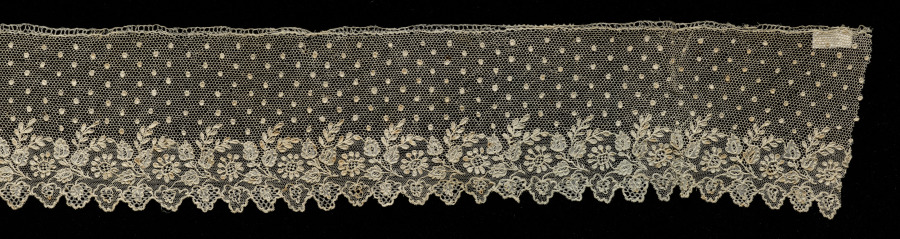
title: Lace Edging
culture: France, Alençon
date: 1700s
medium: Linen: needle lace (Point d'Alençon)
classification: Lace